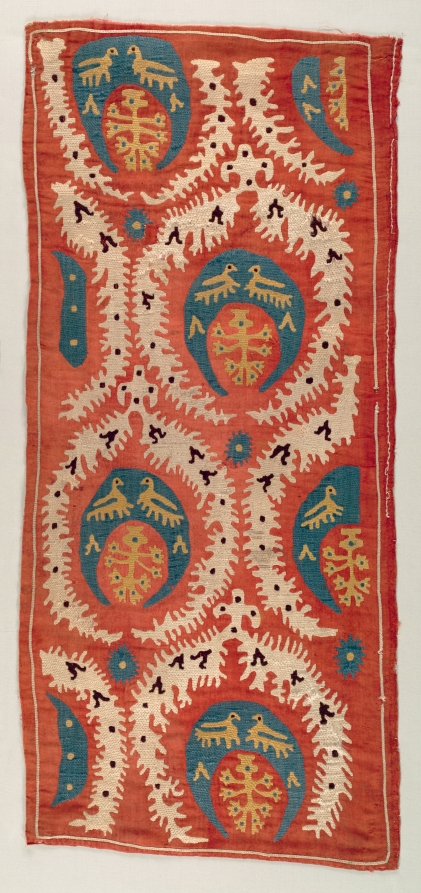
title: Embroidered Cushion Cover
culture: Turkey, 18th century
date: 18th century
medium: embroidery, silk thread on silk ground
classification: Embroidery